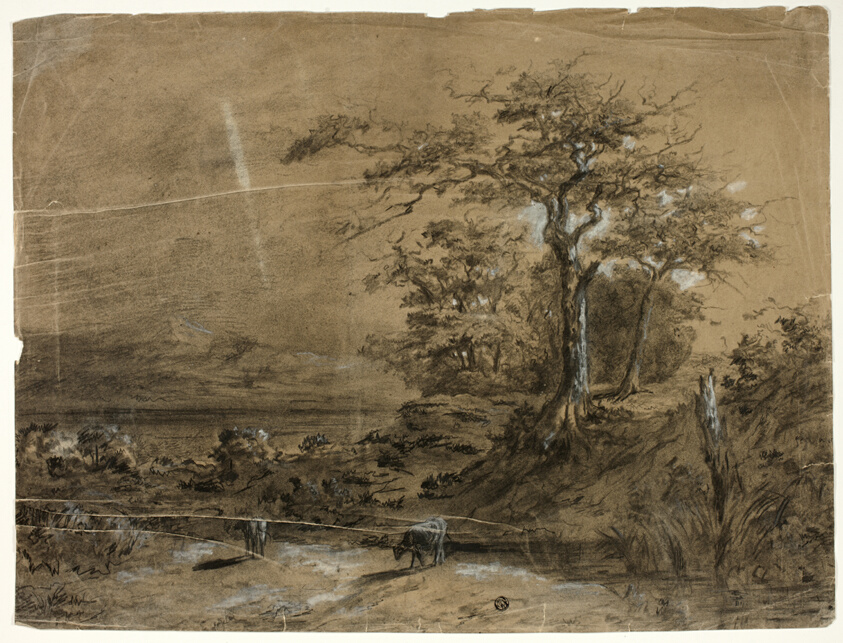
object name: Drawing and Watercolor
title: Wooded Landscape with Cows in Foreground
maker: Unknown Artist; English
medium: Charcoal and stumping, heightened with white chalk and stumping, on light blue wove paper (discolored to brown)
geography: United Kingdom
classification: charcoal; drawings (visual works); prints and drawing